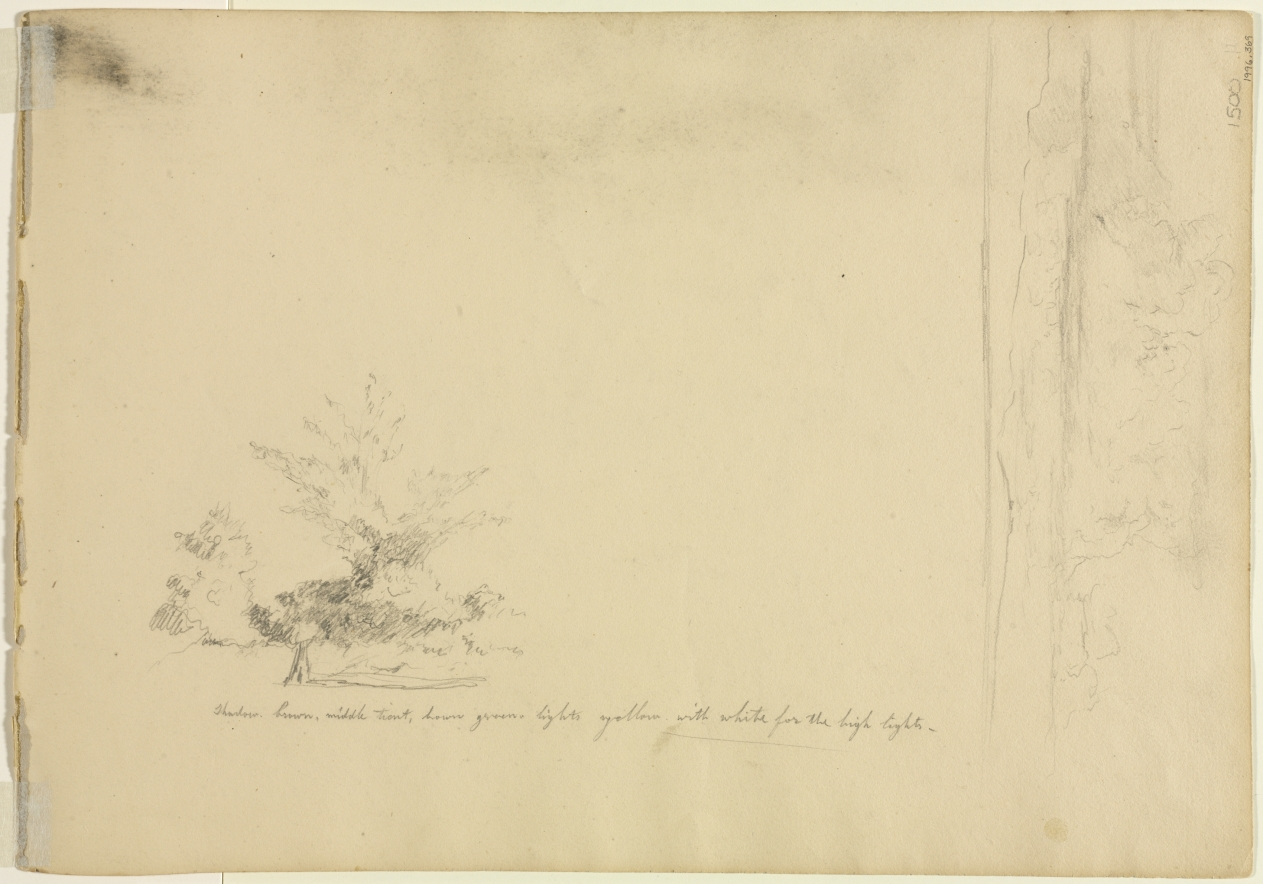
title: Landscape and Tree Studies (verso)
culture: America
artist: David Johnson (American, 1827–1908)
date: c. 1851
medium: graphite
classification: Drawing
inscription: by artist, in graphite, across bottom: shadow. brown, middle tient, brown green. lights yellow. with white for the high lights. [partially underlined] ; by unkown hand, lower right, in graphite: 1500 ; by different unknown hand, lower right, in graphite: 120 [partially erased)